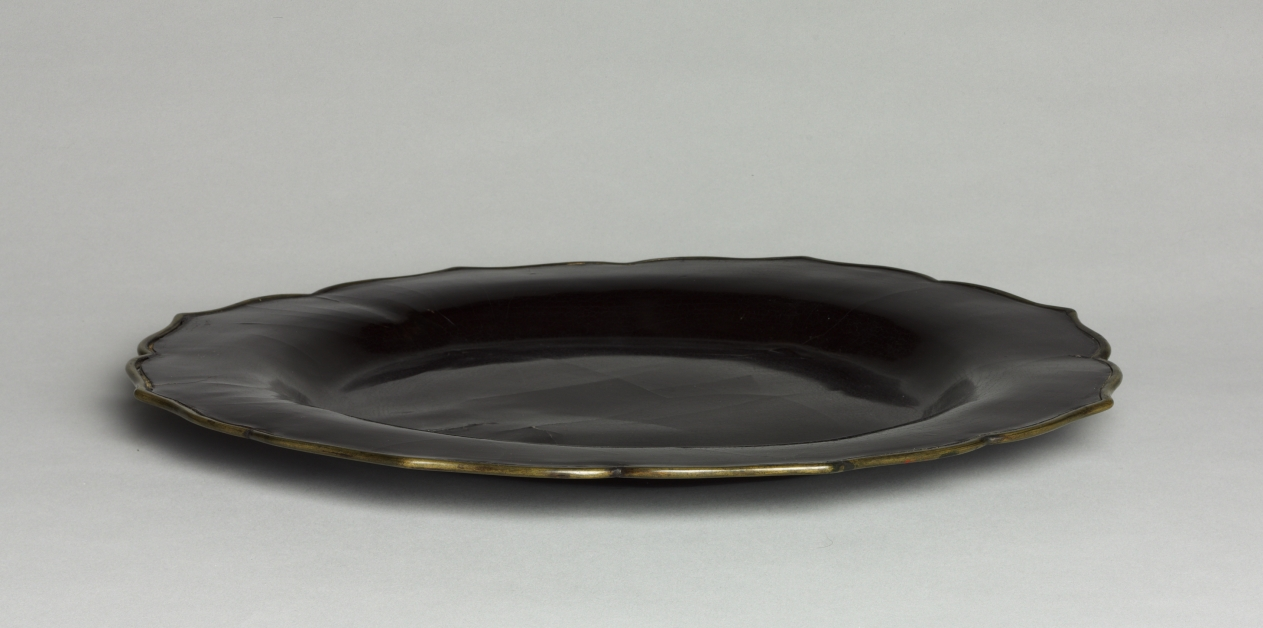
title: Foliate Dish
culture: China, Southern Song Dynasty (1127-1279) - Yuan Dynasty (1271-1368)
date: 1200s–1300s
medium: lacquer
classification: Lacquer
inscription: Red lacquer seal on base of plate.